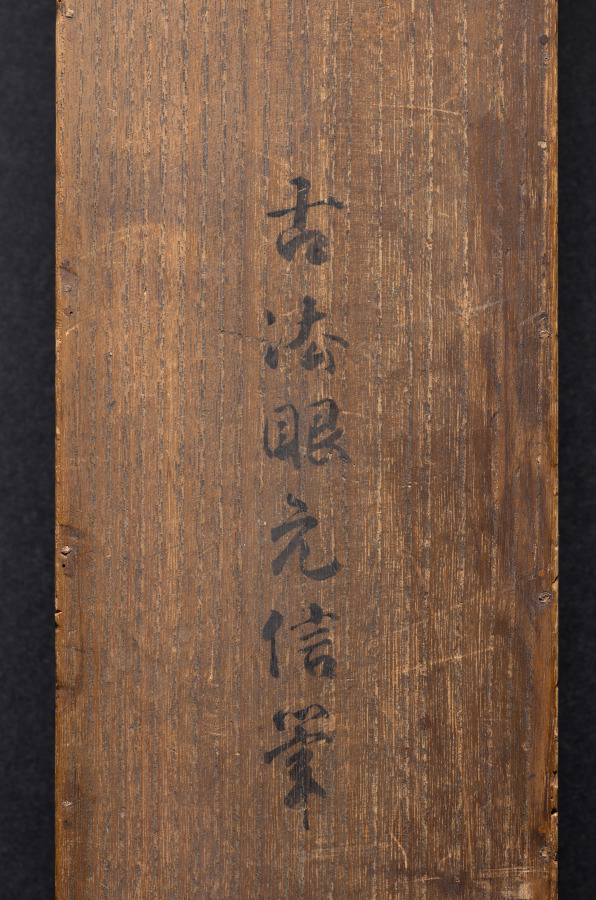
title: Rocks and Waves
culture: Japan, Muromachi period (1392–1573)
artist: attributed to Kano Motonobu (Japanese, c. 1476–1559)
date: early to mid-1500s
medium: sliding door fragment mounted as a hanging scroll; ink and gold wash on paper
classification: Painting